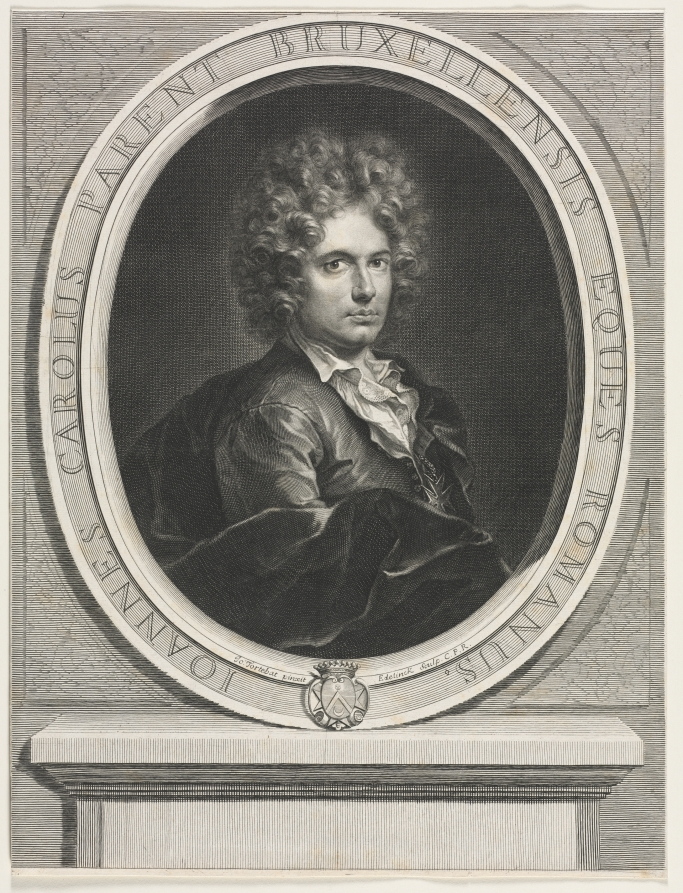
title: Jean Charles Parent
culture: France, 17th century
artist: Gerard Edelinck (French, 1640–1707)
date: c. 1670–1700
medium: engraving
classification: Print